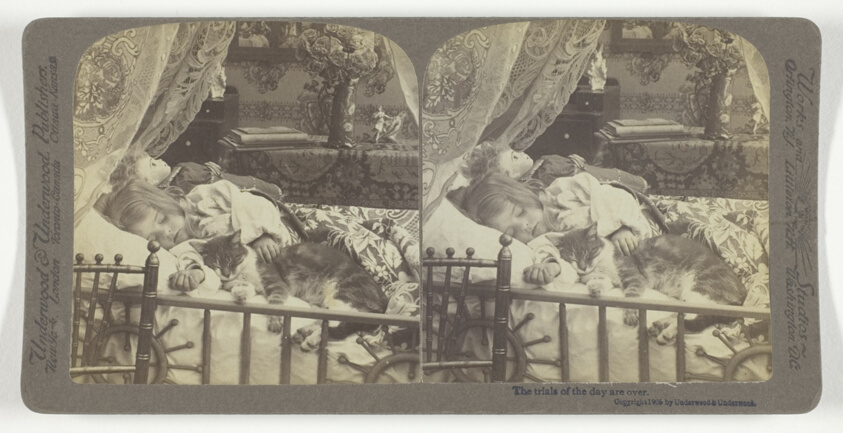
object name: Photograph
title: The trials of the day are over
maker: Underwood & Underwood (American, active 1881-1920)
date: 1905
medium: Albumen print, stereo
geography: New York City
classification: photography; photograph